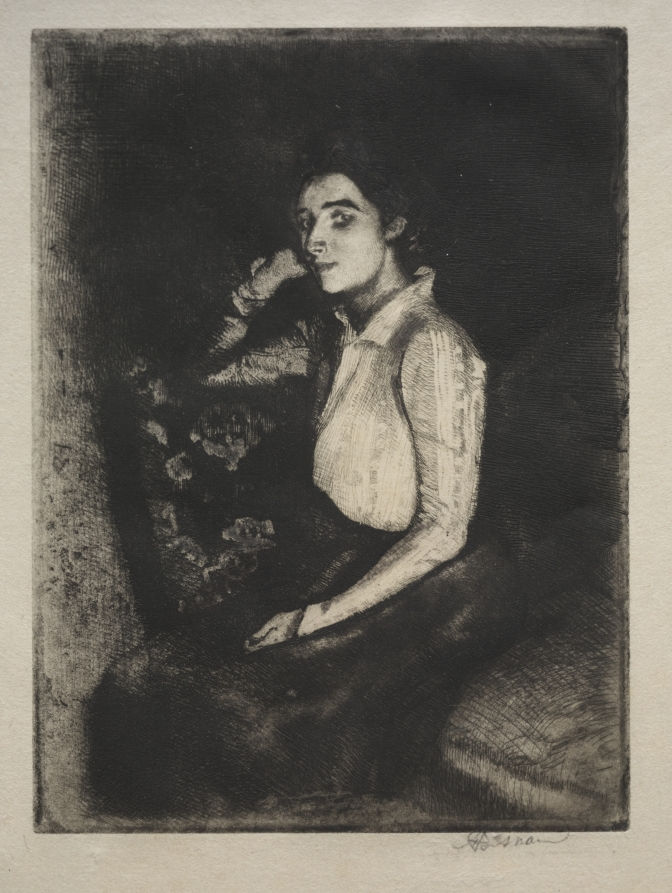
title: Le Biarotte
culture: France, 19th-20th Century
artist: Albert Besnard (French, 1849–1934)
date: 1901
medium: etching and aquatint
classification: Print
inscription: signed, lower left, in graphite: Besnard